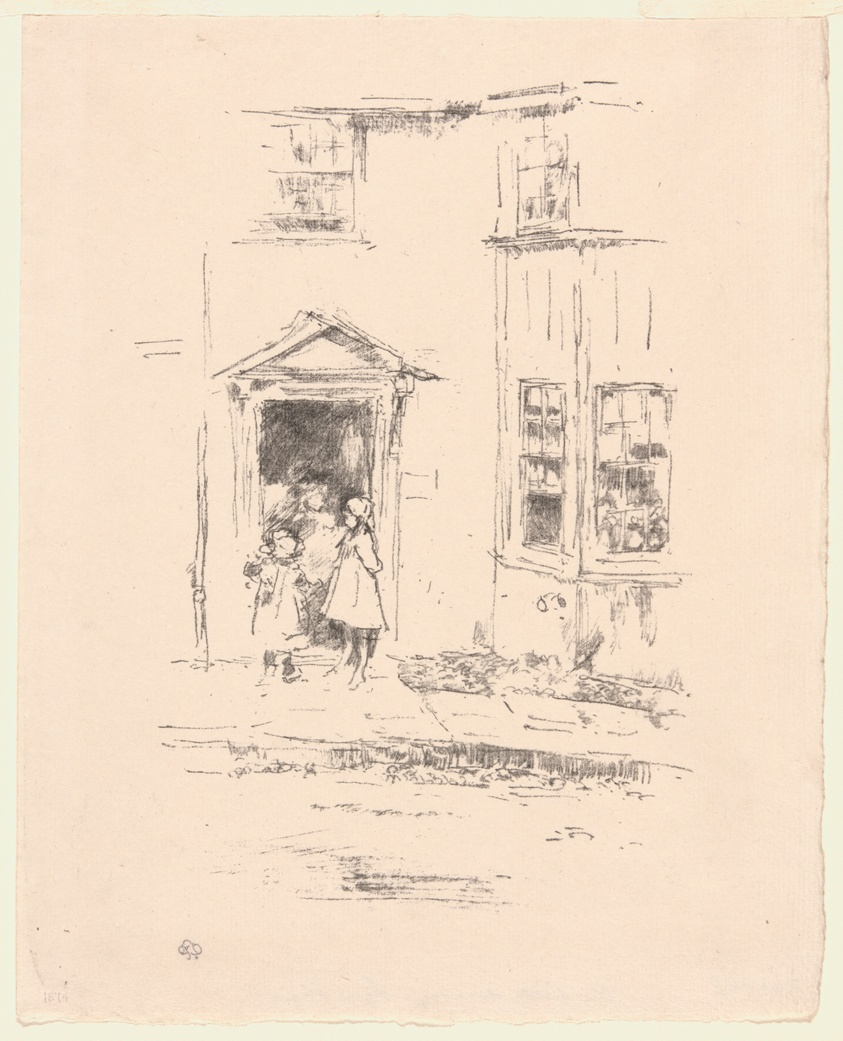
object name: Print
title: The Little Doorway, Lyme Regis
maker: James McNeill Whistler (American, 1834-1903)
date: 1895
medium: Transfer lithograph in black on cream wove proofing paper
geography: United States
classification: transfer lithograph; lithograph; print; prints and drawing; paper